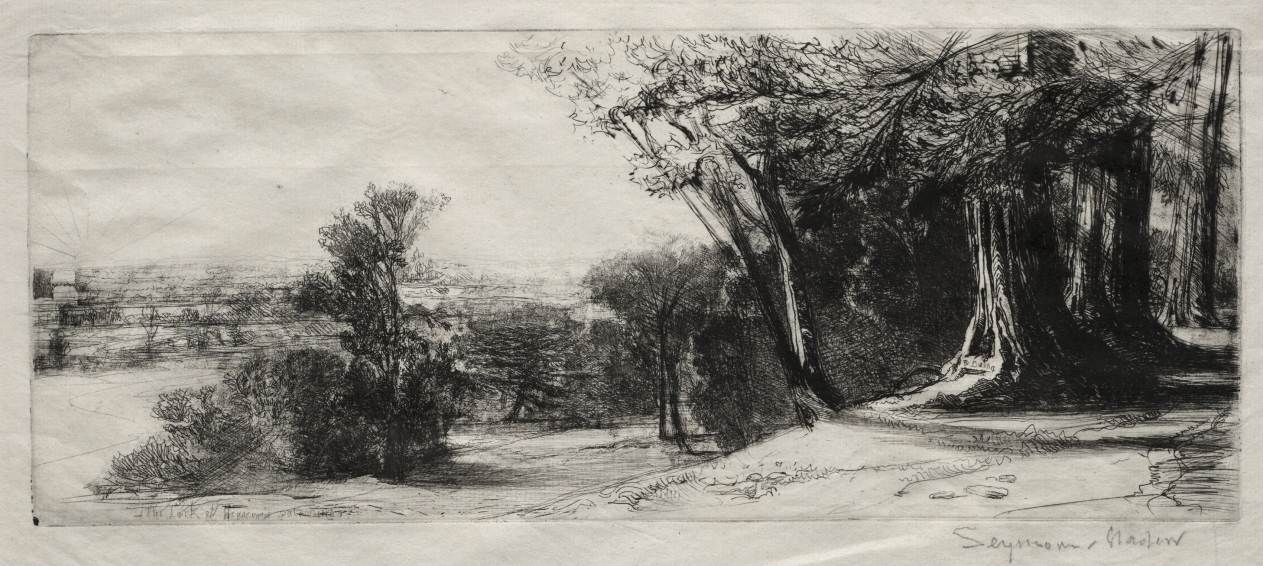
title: Early Morning, Richmond Park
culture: England, 19th century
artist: Francis Seymour Haden (British, 1818–1910)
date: 1859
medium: etching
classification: Print